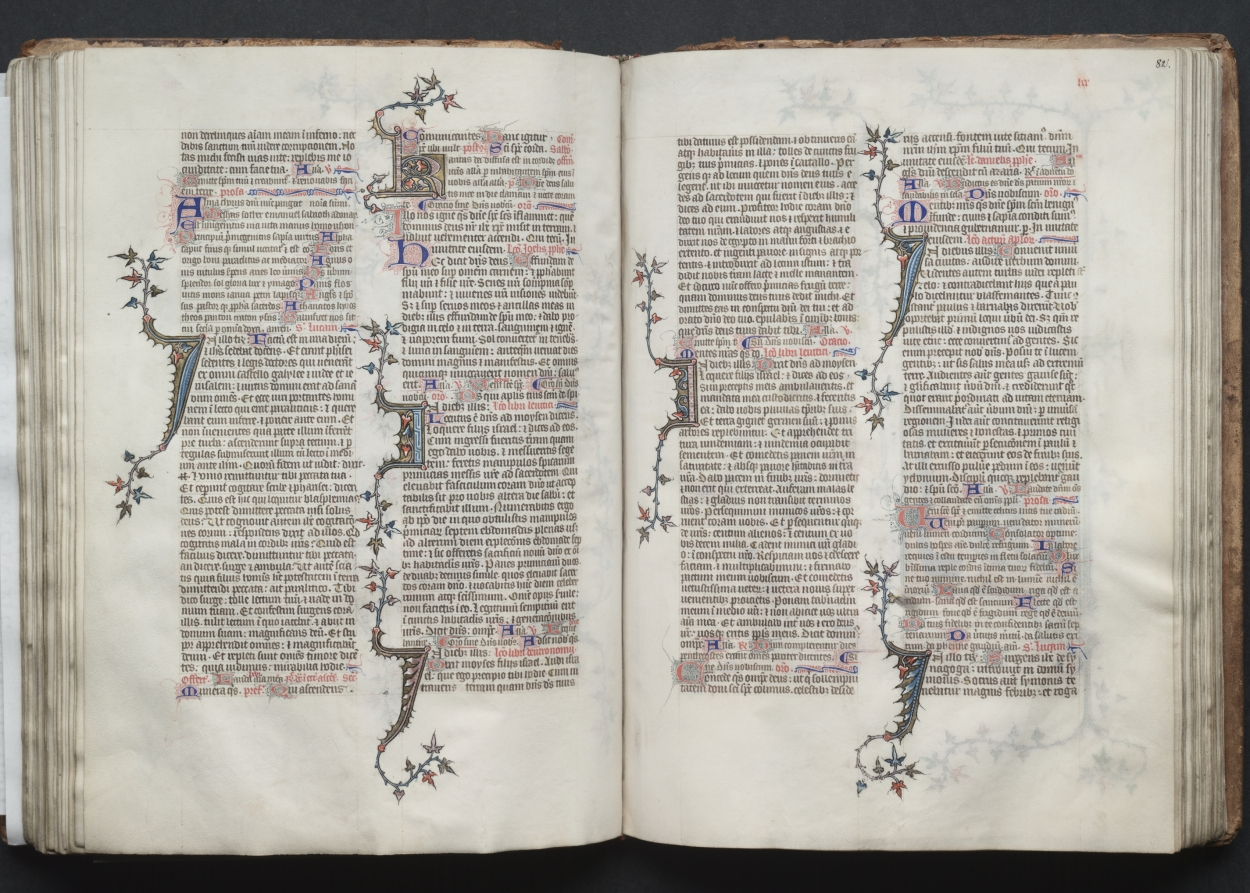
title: The Gotha Missal: Fol. 81v, Text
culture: France, Paris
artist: Master of the Boqueteaux (French)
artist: and Workshop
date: c. 1375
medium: ink, tempera, and gold on vellum; blind-tooled leather binding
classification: Bound Volume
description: The style and quality of this manuscript's decoration is typical of deluxe Parisian books made for aristocratic or royal patrons. Most of the book's decoration appears to be the work of the Master of the Boqueteaux, an artist active at the court of King Charles V (died 1380). His style was apparently shared by a number of book illuminators working in and around Paris. It is very possible that the Gotha Missal belonged to Charles V, but is not provable because the manuscript has no royal portraits and lacks a colophon. Given the book's magnificent decoration, however, it would seem that it was produced for a Valois prince, if not for the king himself. The manuscript receives its name from the German dukes of Gotha, its later owners.